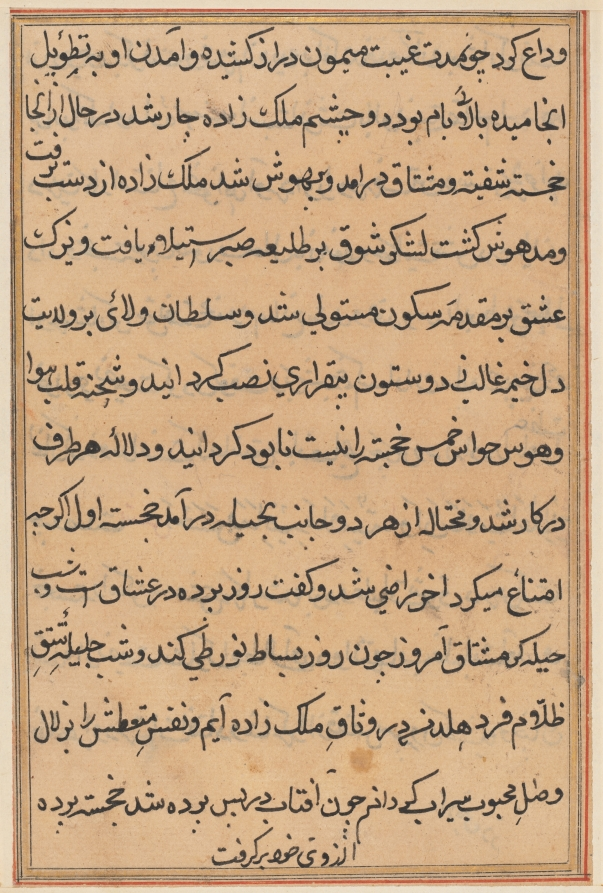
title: Page from Tales of a Parrot (Tuti-nama): text page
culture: Mughal India, court of Akbar (reigned 1556–1605)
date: c. 1560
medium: gum tempera, ink, and gold on paper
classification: Painting